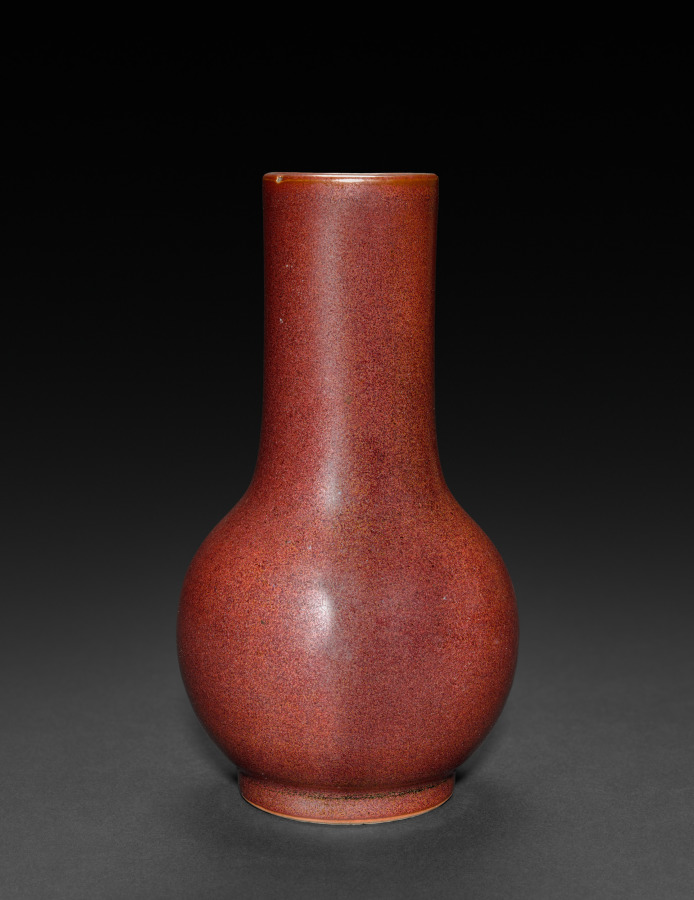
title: Bottle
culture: China, Qing dynasty (1644–1911), Qianlong reign (1736–95)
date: 1736–95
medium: porcelain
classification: Ceramic